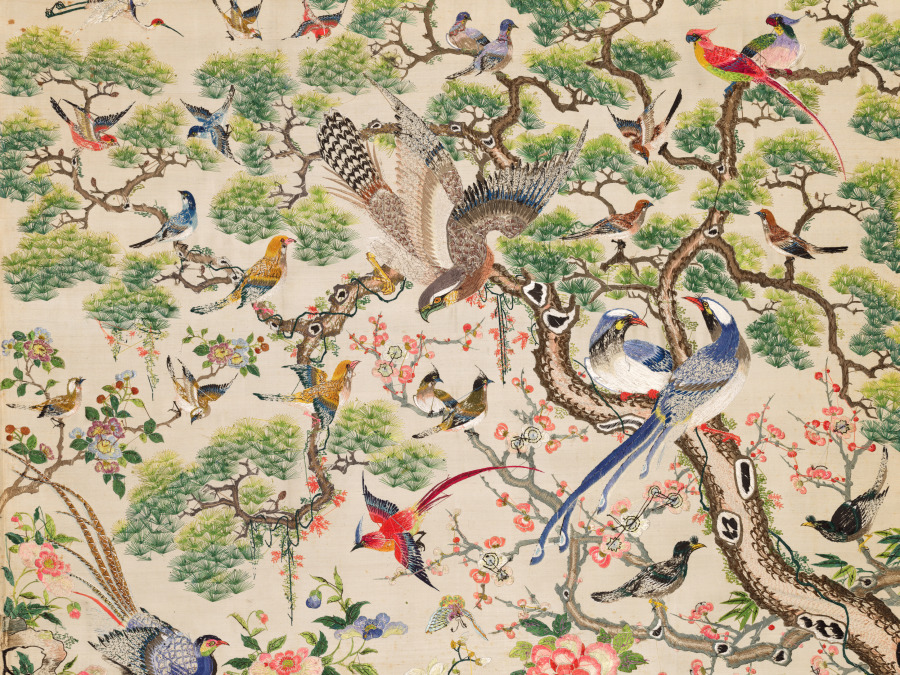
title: A Myriad of Birds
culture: China, Qing dynasty (1644–1911)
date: 1700s–1800s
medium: silk: satin weave with polychrome silk embroidery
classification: Embroidery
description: This embroidered panel, made with extremely fine silk threads, presents a lavishly detailed composition filled with fortuitous imagery. Pairs of birds, including mandarin ducks, peacocks, cranes, swallows, and pheasants, move among flowering trees, ornamental rocks, and aquatic plants, symbolizing harmony, prosperity, and longevity. Cranes stand for longevity, while a pair of mandarin ducks convey wishes for a harmonious marriage. Inspired by the decorative bird-and-flower paintings of the artist Lü Ji, the work prioritizes symbolism over spatial logic. With vibrant colors, meticulous stitching, and fortuitous meaning, the embroidery exemplifies the technical brilliance of Qing dynasty textile art, rivaling the quality of imperial production.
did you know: This magnificent textile, probably executed by a woman, demonstrates the tradition of making embroidered pictures in imitation of paintings.